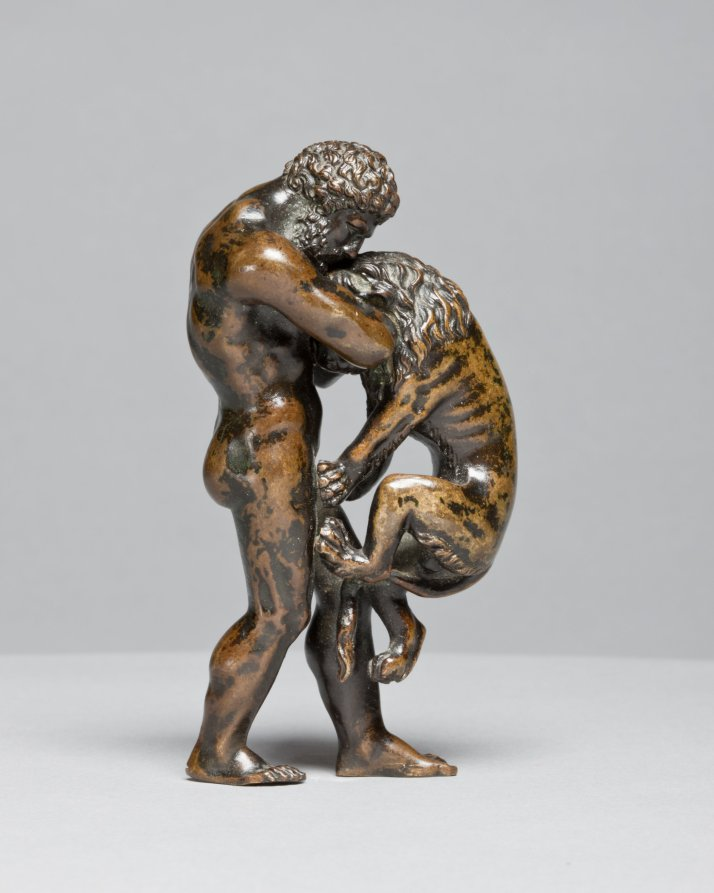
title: Hercules and the Nemean Lion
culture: Italy or France, 16th century or later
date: 1500s or later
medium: bronze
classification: Sculpture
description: The original owner of this work would have understood that this scene referred to the entire story of Hercules, the demi-god who had to accomplish twelve labors. The lion is named after the city of Nemea, near Corinth, a monstrous beast sent by the goddess Hera to wreak havoc on the area. After killing the lion, Hercules wore his pelt, commonly seen in other representations of the hero.